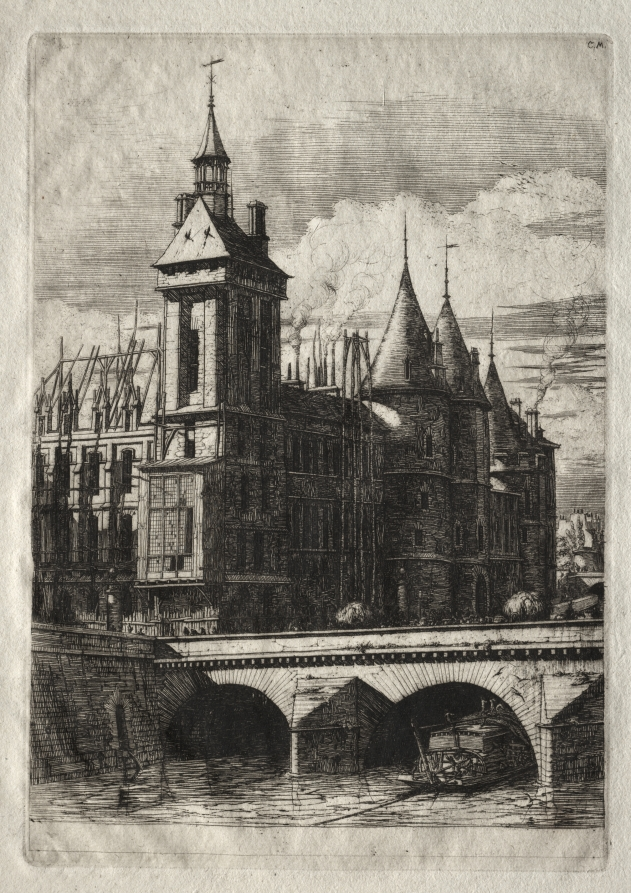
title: Etchings of Paris: The Clock Tower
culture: France, 19th century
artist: Charles Meryon (French, 1821–1868)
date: 1852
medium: etching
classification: Print